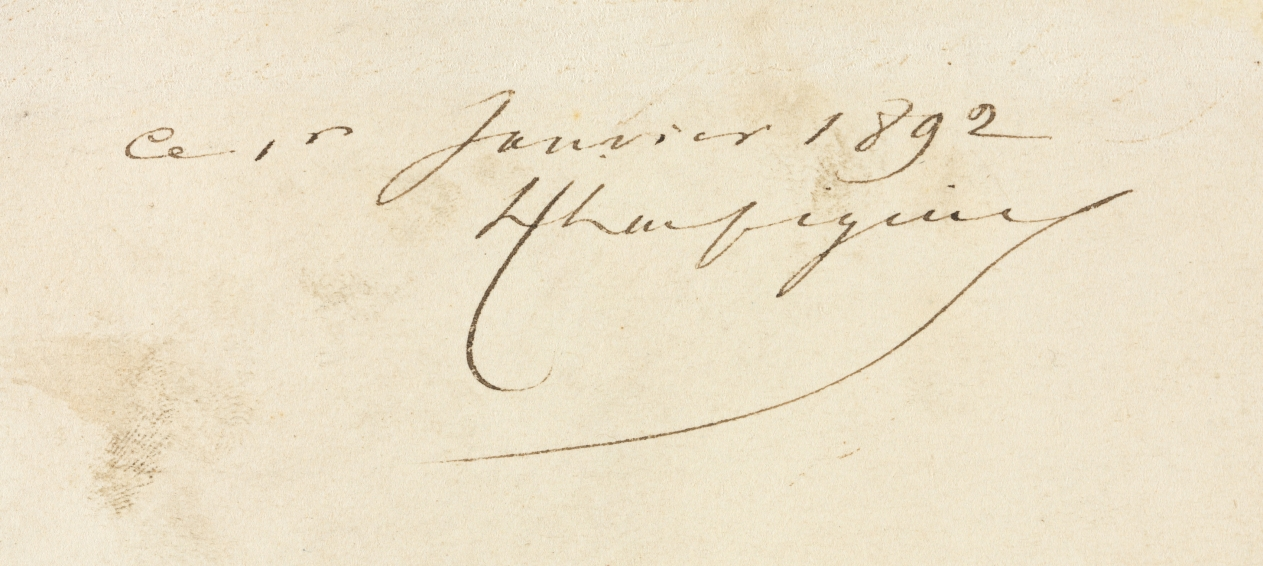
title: Landscape with Farmhouse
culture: France, 19th century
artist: Henri Joseph Harpignies (French, 1819–1916)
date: 1892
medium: watercolor with graphite underdrawing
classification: Drawing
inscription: Inscribed, lower left in brown ink: "Harpignies" Indecipherable inscription, lower right in brown ink Inscribed in brown ink (verso): "Janvier 1892 / Harpignies"